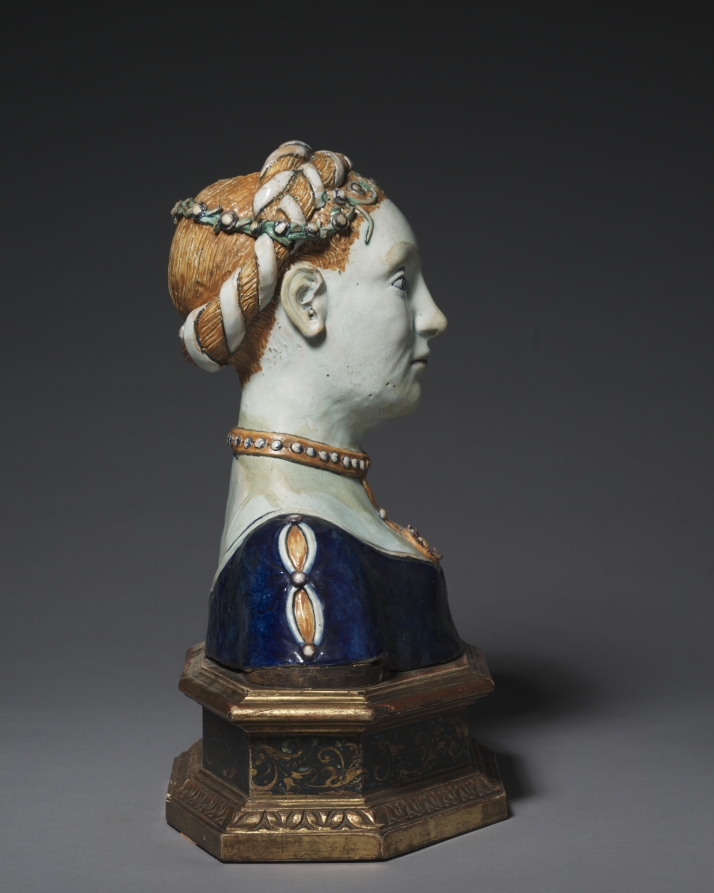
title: Bust of a Woman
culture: Italy, Tuscany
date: early 1500s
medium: tin-glazed earthenware (maiolica)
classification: Sculpture